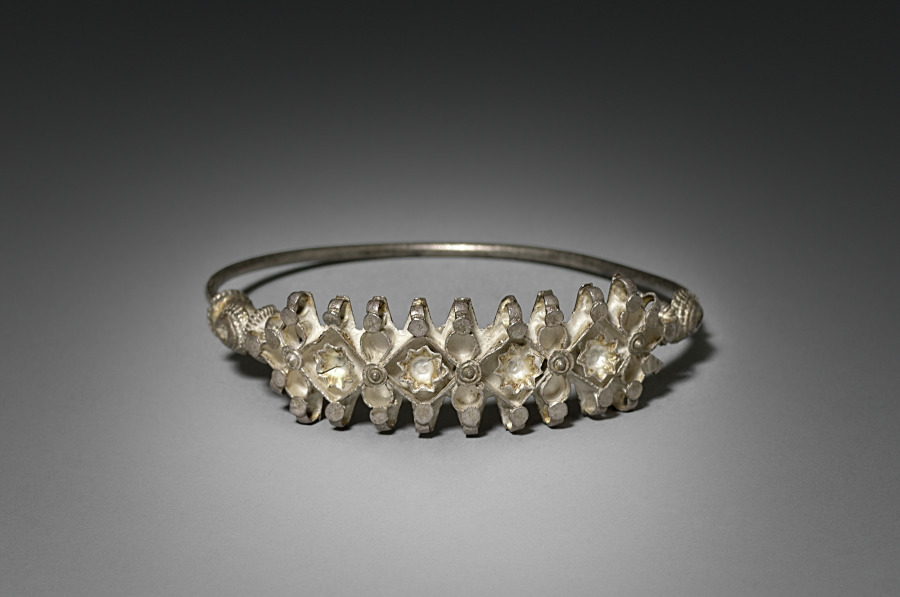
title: Nose Ring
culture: India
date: early 1900s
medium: silver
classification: Jewelry